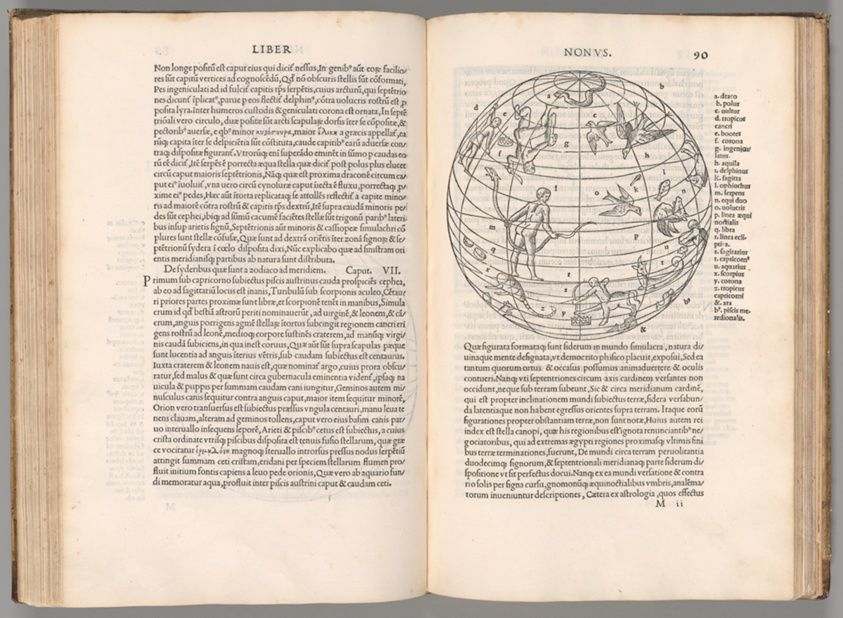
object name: Book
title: De Architectura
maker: Marcus Vitruvius Pollio (Roman, active first century BCE)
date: Venice, Italy: Ioannis de Tridino, also known as Tacuino, 1511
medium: Letterpress and woodcut in black on ivory laid paper; four-piece decorative woodcut title border with scrolling foliage and dolphin motifs; full alum-tawed ornamental leather binding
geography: Italy